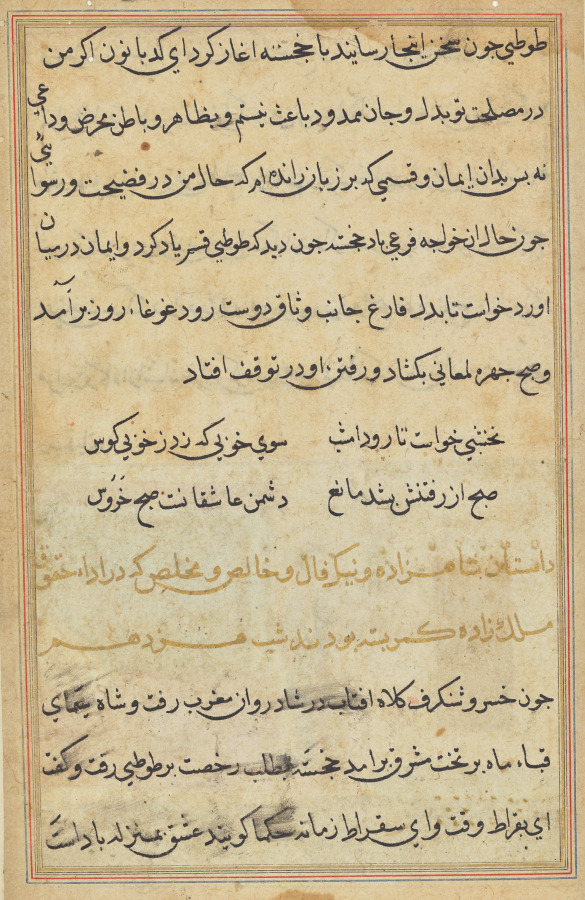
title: Page from Tales of a Parrot (Tuti-nama): text page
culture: Mughal India, court of Akbar (reigned 1556–1605)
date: c. 1560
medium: gum tempera, ink, and gold on paper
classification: Painting